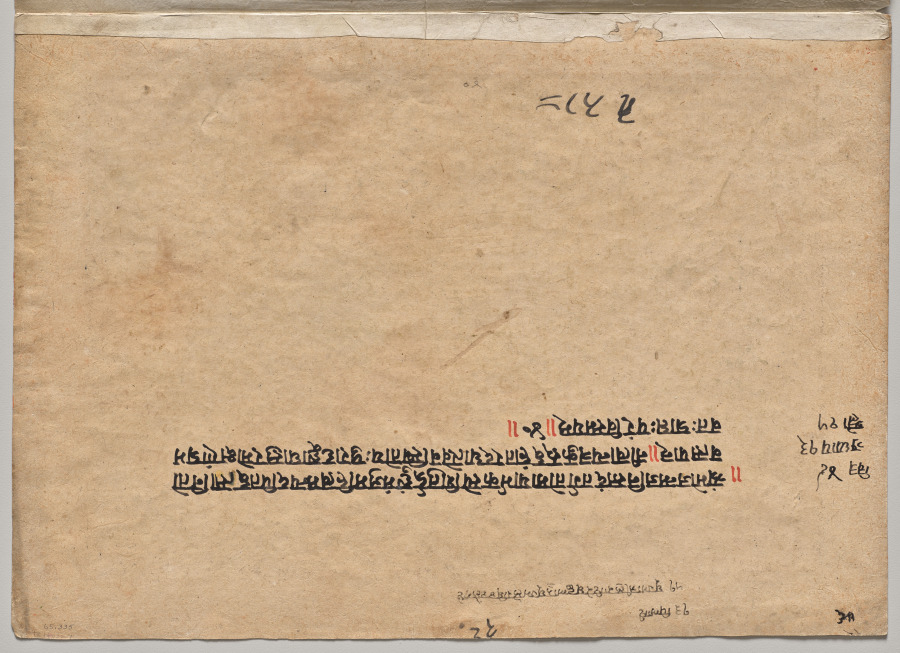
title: Brahma Hides the Cowherds and the Calves in the Cave, page from a Bhagavata Purana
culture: India, Pahari Hills, Basholi School, 18th century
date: c. 1760–65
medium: Gum tempera, ink, and gold on paper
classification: Painting